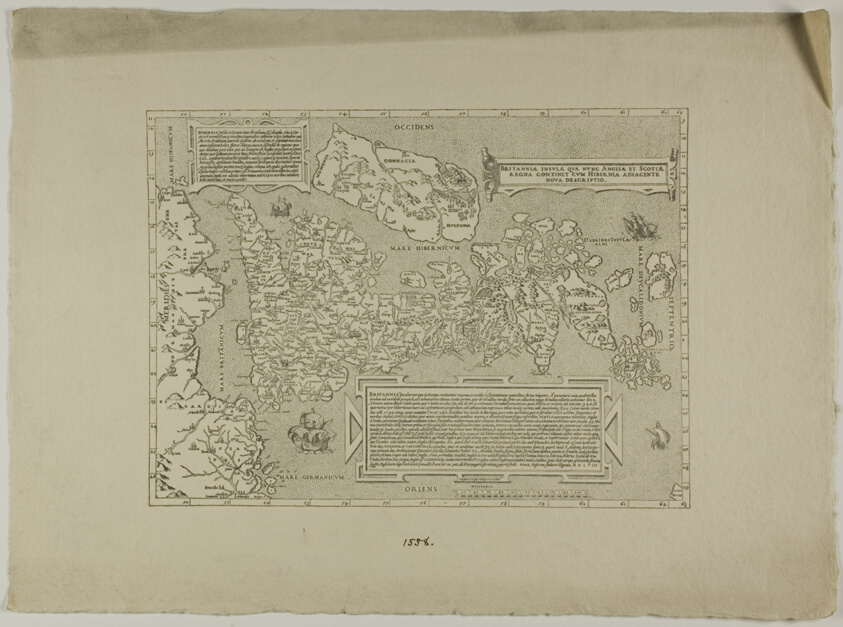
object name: Print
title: Britannia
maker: Unknown Artist; English, 19th century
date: 1558, reprinted 1889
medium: Woodcut in black on cream laid paper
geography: England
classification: reproduction; print; prints and drawing